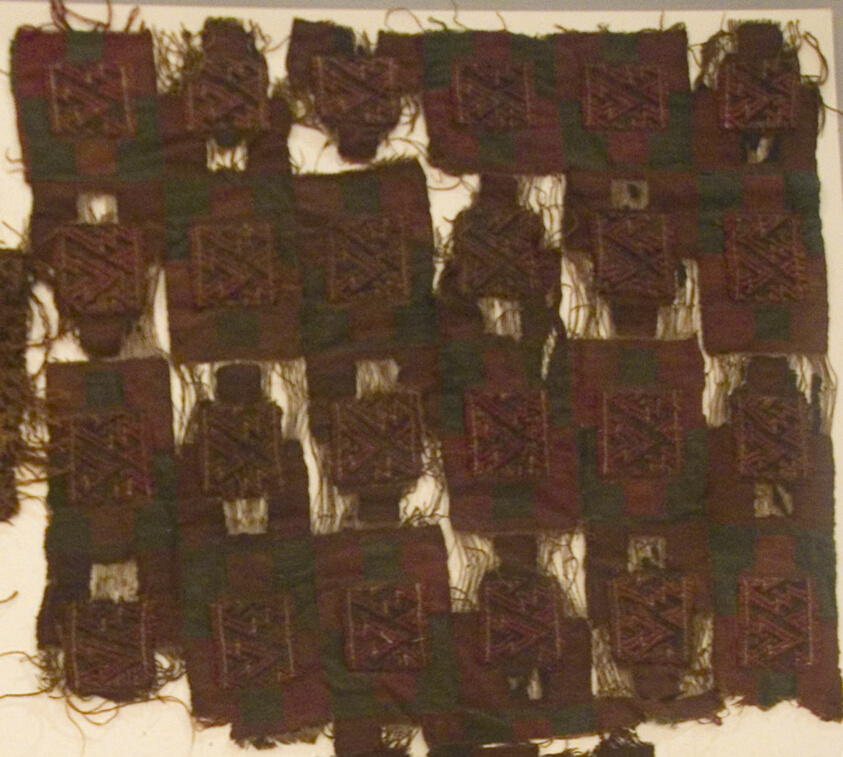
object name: Textile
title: Fragment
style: Chuquibamba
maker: Chuquibamba (Probably south coast, Peru)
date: A.D. 1476/1532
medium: Brocaded interlocking tapestry weave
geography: Peru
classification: textile; weaving